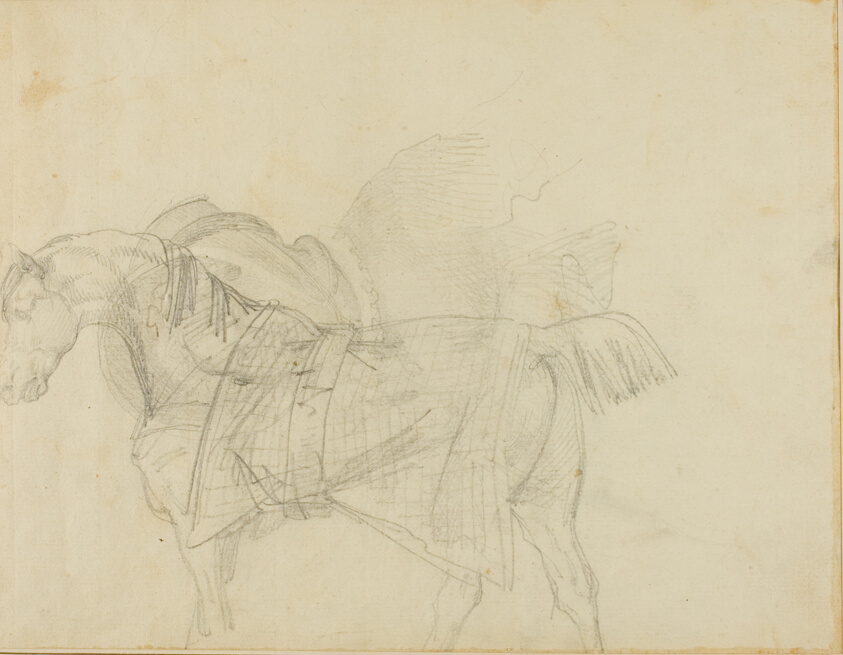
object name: Drawing and Watercolor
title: Horse Wearing a Blanket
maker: Jean Louis André Théodore Géricault (French, 1791-1824)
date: 1818/1819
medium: Graphite, on cream laid paper, perimeter mounted on cream wove paper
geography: France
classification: graphite; drawings (visual works); prints and drawing